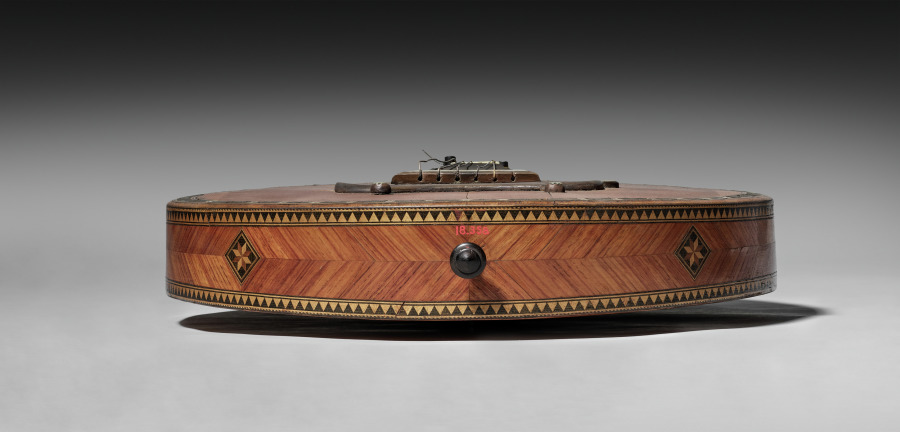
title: Guitar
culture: Italy, 19th century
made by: probably by Fernando Theze (Italian)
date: c. 1860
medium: wood, ebonized wood, mother of pearl inlay, resin, bone?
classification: Musical Instrument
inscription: label inside reads: "Faite a Turin par F. Theze--Amateur."